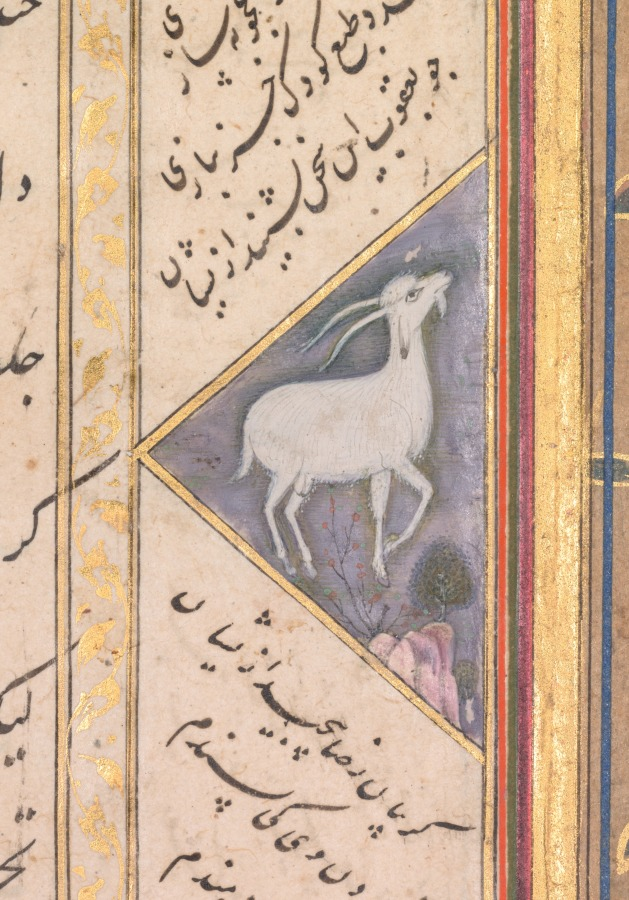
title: Page from a Panj Ganj (Five Treasures) of Abd al-Rahman Jami (Persian, 1414–1492), with two Persian masnavis: Yusuf va Zulaykha (Joseph and Zulaykha) and Subhat al-abrar (Rosary of the Righteous) (verso)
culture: Northern India, Mughal, early 17th century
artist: Mushfiq (Indian, active early 1600s)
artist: and others (Indian)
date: 1520–1607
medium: Gum tempera, ink, and gold on paper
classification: Painting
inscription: The miniature signed at upper left: ' amal - i Mushfiq sana 1015 (the work of the Mushfiq year 1015) Text on verso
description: This page is from a prized manuscript owned by one of the most respected statesmen of the imperial Mughal court, Abd al-Rahim. He served as the Khan Khanan, or vizier, the trusted minister under both Akbar and Jahangir. Abd al-Rahim was an avid book collector and patron of the arts. He acquired this book of five extended narrative poems, which included the story told in rhyme of the romance between Joseph and the Egyptian lady Zulaykha, about 80 years after its completion. The book’s illumination had not been finished, so Abd al-Rahim commissioned the exuberant decor of the borders and insets along with fullpage paintings that illustrate key scenes in the text.